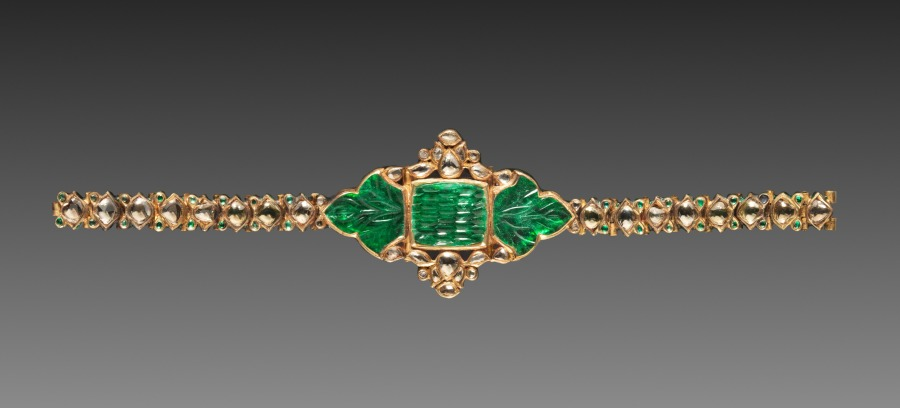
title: Bracelet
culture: India, Mughal, Rajasthan, Jaipur, 18th century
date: 1700s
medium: Gold, emeralds, diamonds, and enamel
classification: Jewelry